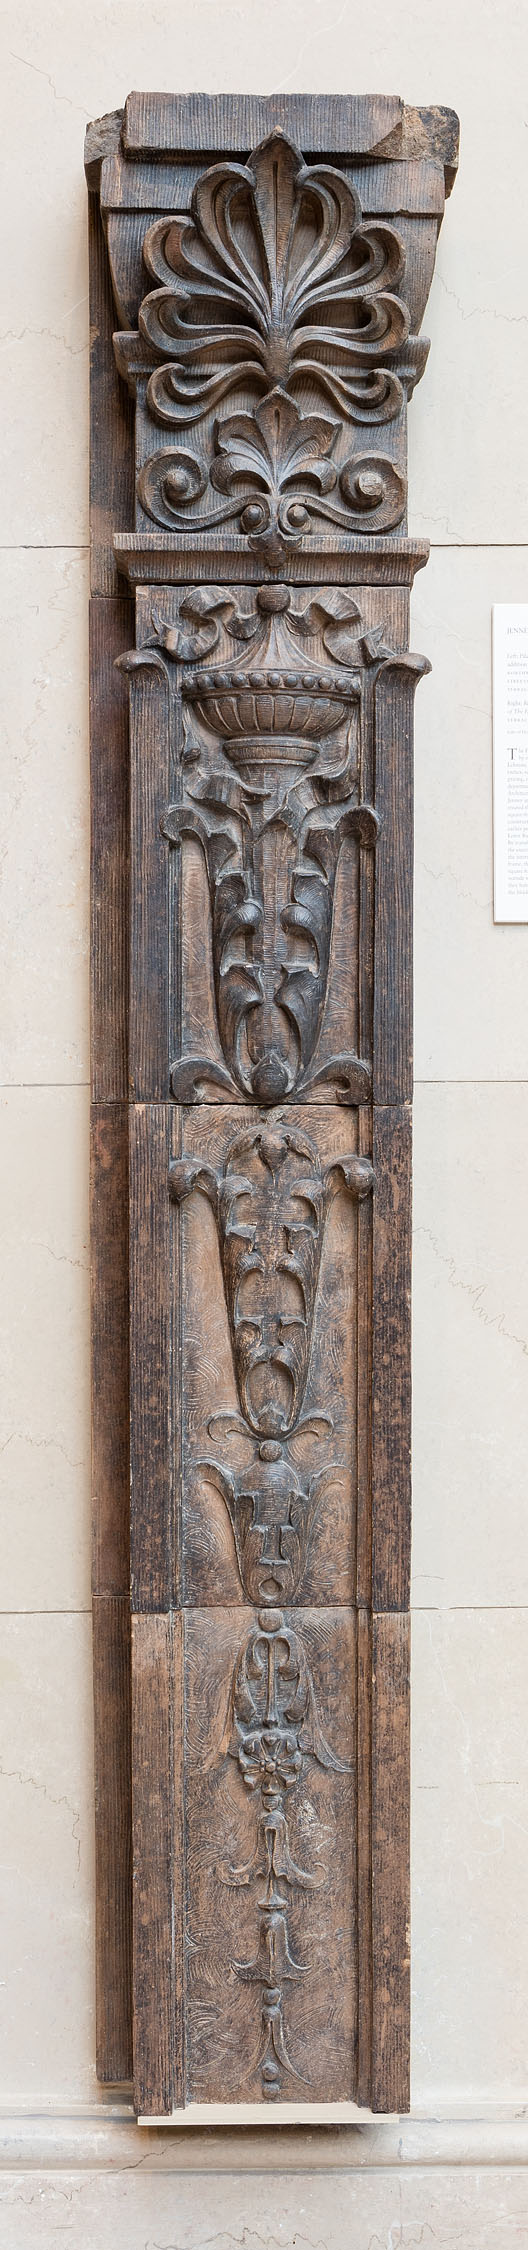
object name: Architectural fragment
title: The Fair Store: Pilaster from the Exterior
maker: William LeBaron Jenney (American, 1832-1907)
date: 1890/91, addition 1896/97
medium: Terra-cotta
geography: Chicago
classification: architecture; architectural fragment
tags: Chicago